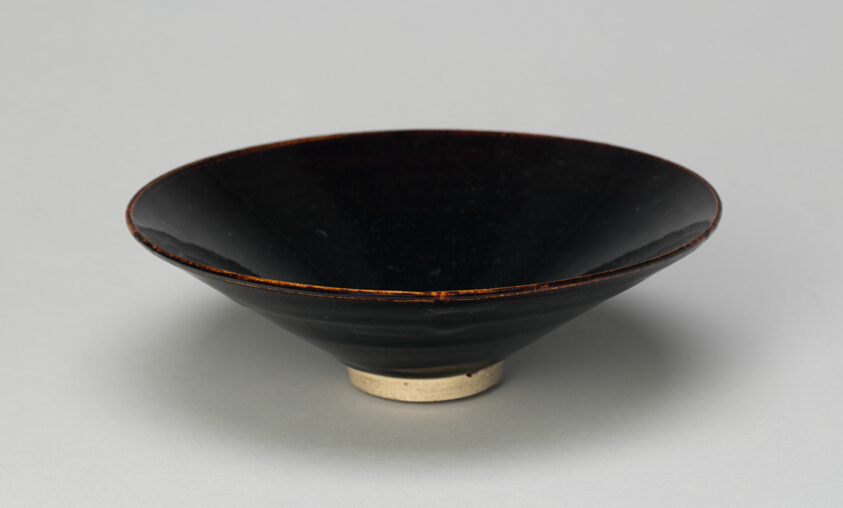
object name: Vessel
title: Conical Bowl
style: Chinese (culture or style)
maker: China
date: Northern Song dynasty (960–1127), early 12th century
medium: Cizhou type ware; stoneware with brownish-black glaze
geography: China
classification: bowl; stoneware; dish (vessel); asian art; ceramics; vessel